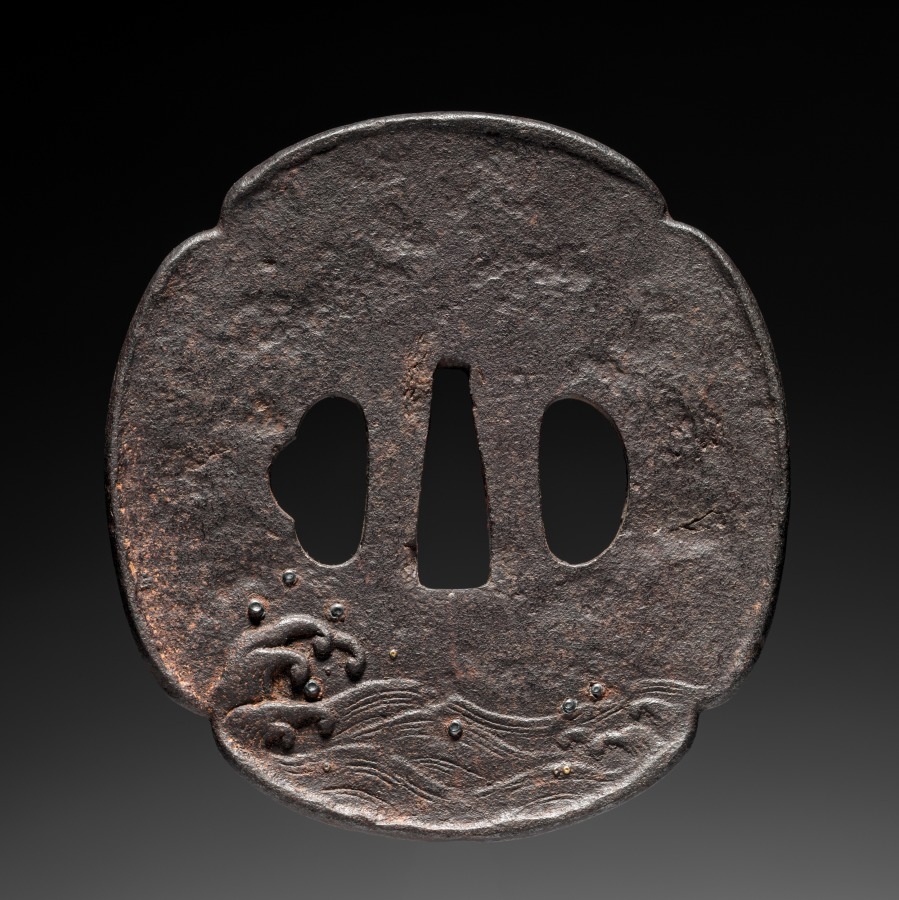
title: Sword Guard (Tsuba) with Rabbit and Waves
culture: Japan, possibly Edo period (1615-1868)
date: c. 1615–1868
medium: iron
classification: Arms and Armor